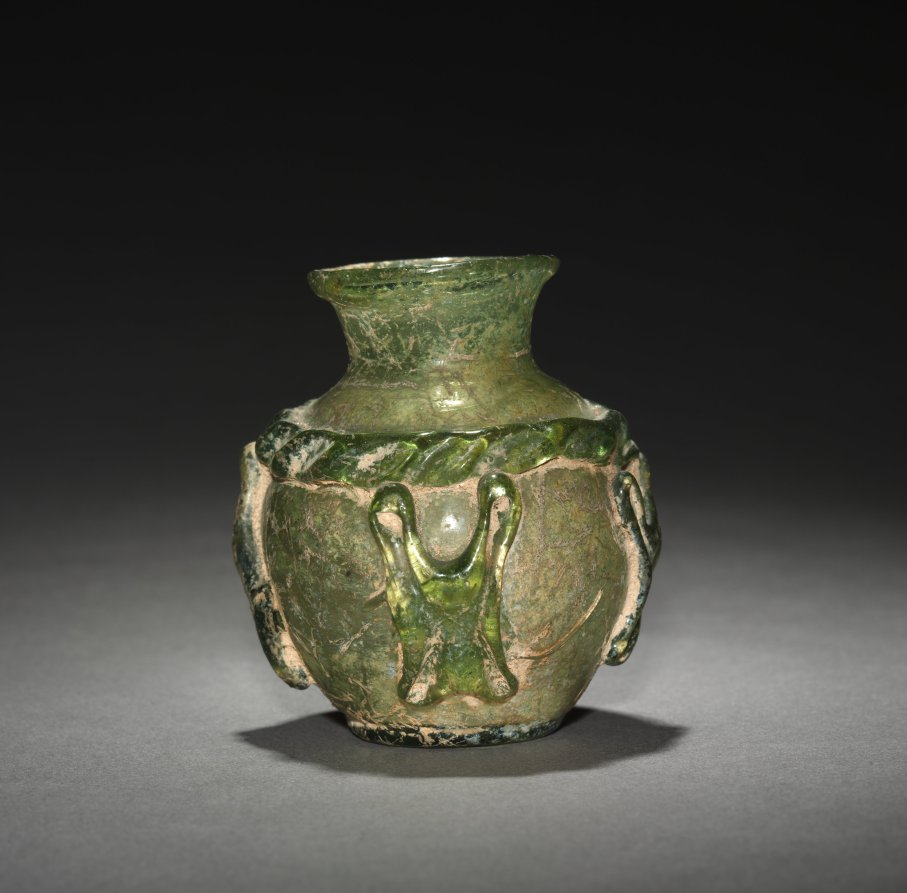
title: Vase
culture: Early Islamic, Eastern Mediterranean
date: 600s–800s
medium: glass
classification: Glass